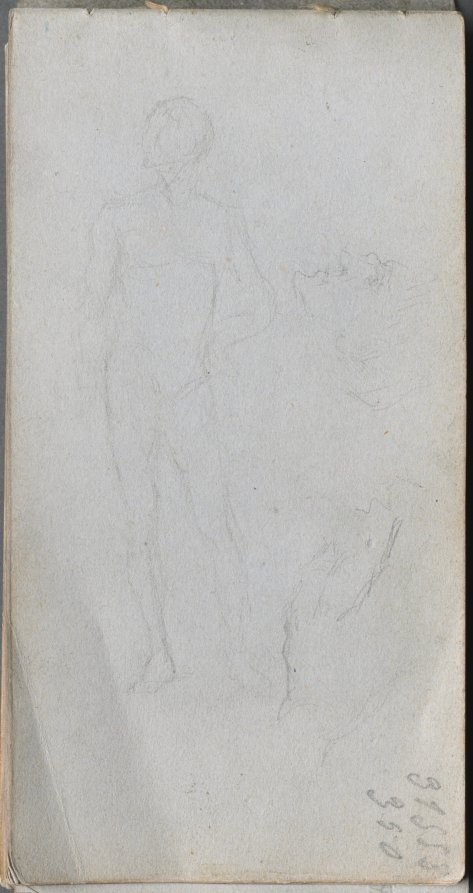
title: Sketchbook, page 100: Nude Figure, Profile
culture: France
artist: Ernest Meissonier (French, 1815–1891)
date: c. 1860s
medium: graphite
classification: Bound Volume